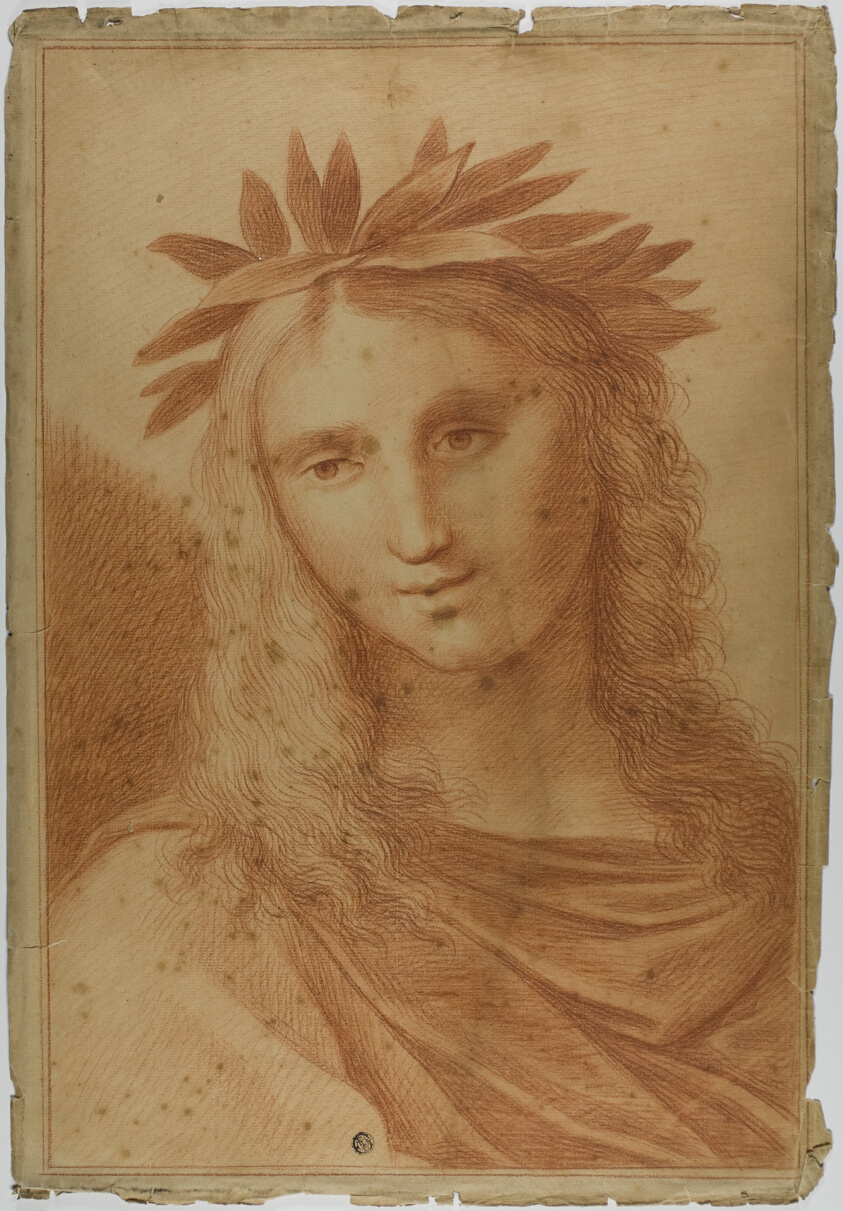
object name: Drawing and Watercolor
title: Woman Crowned with Laurel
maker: After Raffaello Sanzio, called Raphael; Italian, 1483-1520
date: 18th century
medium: Red chalk and stumping, with traces of red chalk wash, on cream laid paper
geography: Italy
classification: chalk; drawings (visual works); prints and drawing